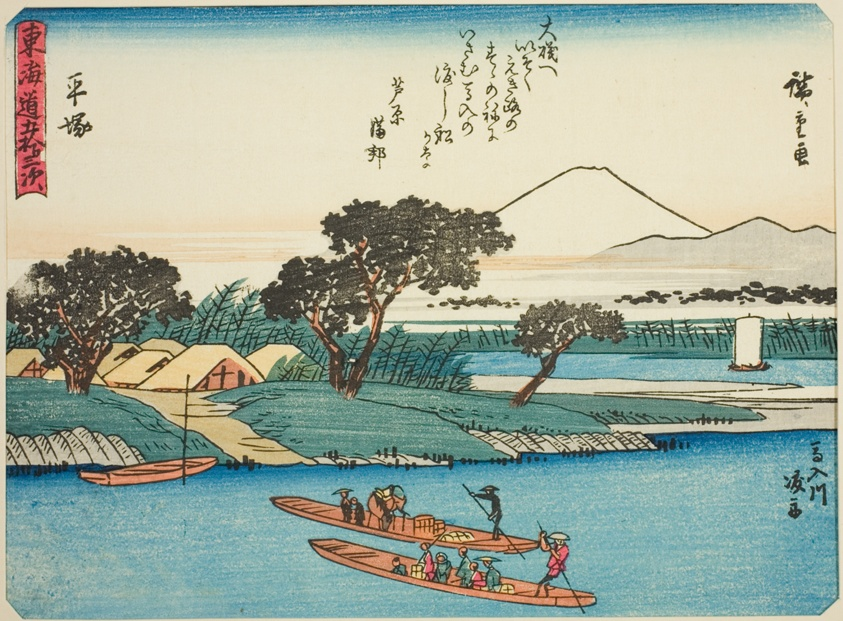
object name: Print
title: Hiratsuka: Ferryboats on the Banyu River (Hiratsuka, Banyugawa watashibune), from the series "Fifty-three Stations of the Tokaido (Tokaido gojusan tsugi)," also known as the Tokaido with Poem (Kyoka iri Tokaido)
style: Japanese (culture or style)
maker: Utagawa Hiroshige 歌川 広重; Japanese, 1797-1858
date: c. 1837/42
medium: Color woodblock print; chuban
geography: Japan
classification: woodblock print; print; asian art